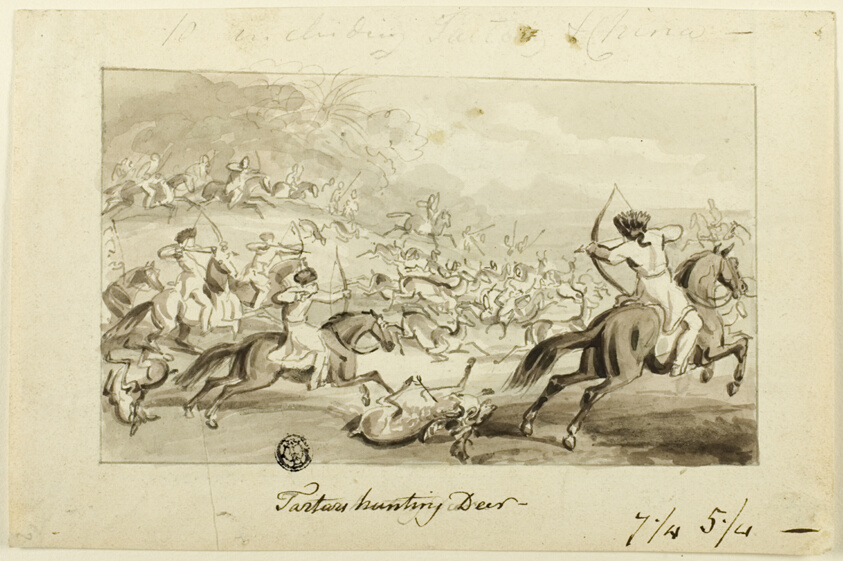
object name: Drawing and Watercolor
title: Tartars Hunting Deer (recto); Shell (verso)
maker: Recto attributed to Samuel Howett (English, c. 1765-1822); Verso by Unknown Artist (British, 19th century)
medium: Pen and brown ink, with brush and gray and brown wash, over graphite (recto), and print (verso), on ivory wove paper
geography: England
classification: ink or chalk wash; drawings (visual works); prints and drawing